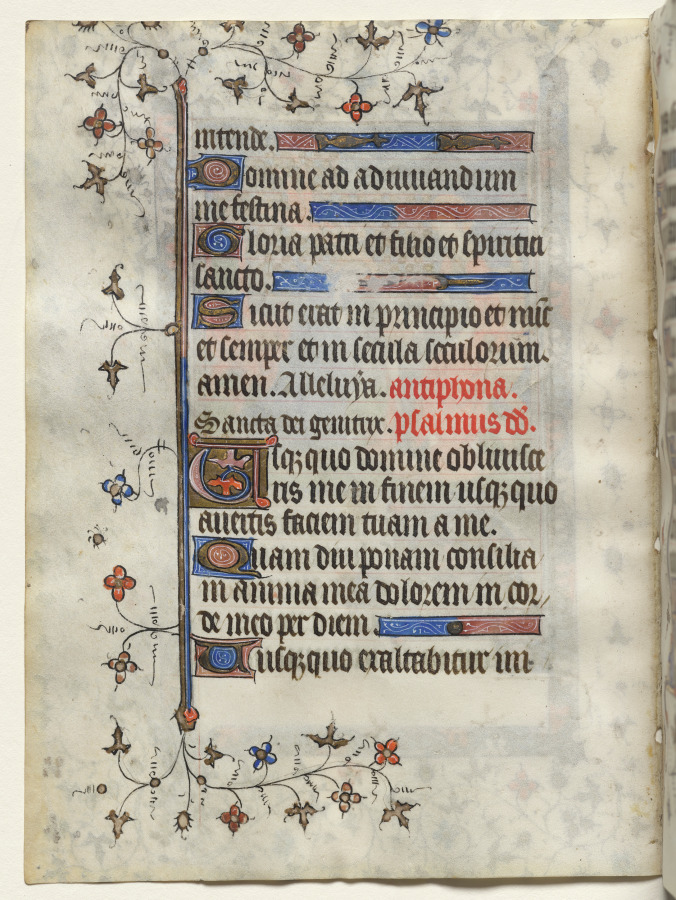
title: Bifolio from a Book of Hours: Text (verso)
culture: France, Paris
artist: workshop of Boucicaut Master (French, Paris, active about 1410–25)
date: c. 1415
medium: ink, tempera, and gold on vellum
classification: Manuscript